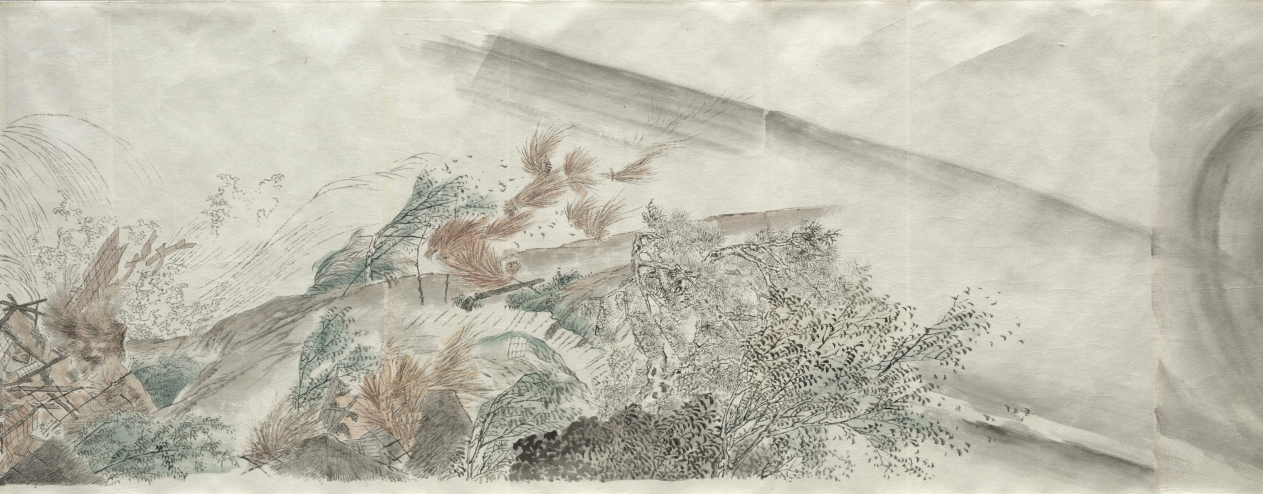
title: Sketch Copy of Natural Disasters, from the Seven Fortunes and Misfortunes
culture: Japan, Edo period (1615–1868) to Meiji period (1868–1912)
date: after 1773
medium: handscroll; ink and color on paper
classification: Painting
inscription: Signed: Gettcho; dated 1773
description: This unmounted handscroll is a copy of the first of a three-scroll set painted by Maruyama Ōkyo (1733–1795) for Buddhist monk Yujō (1723–1773). It depicts people's unfortunate encounters with forces of nature from wind to beasts. Ōkyo's realistic, contemporary imagery was meant to evoke a sense of recognition and empathy in viewers, shocking them into avoidance of possible punishments.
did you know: Notations that appear throughout the scroll indicate colors and other details of the original painting.